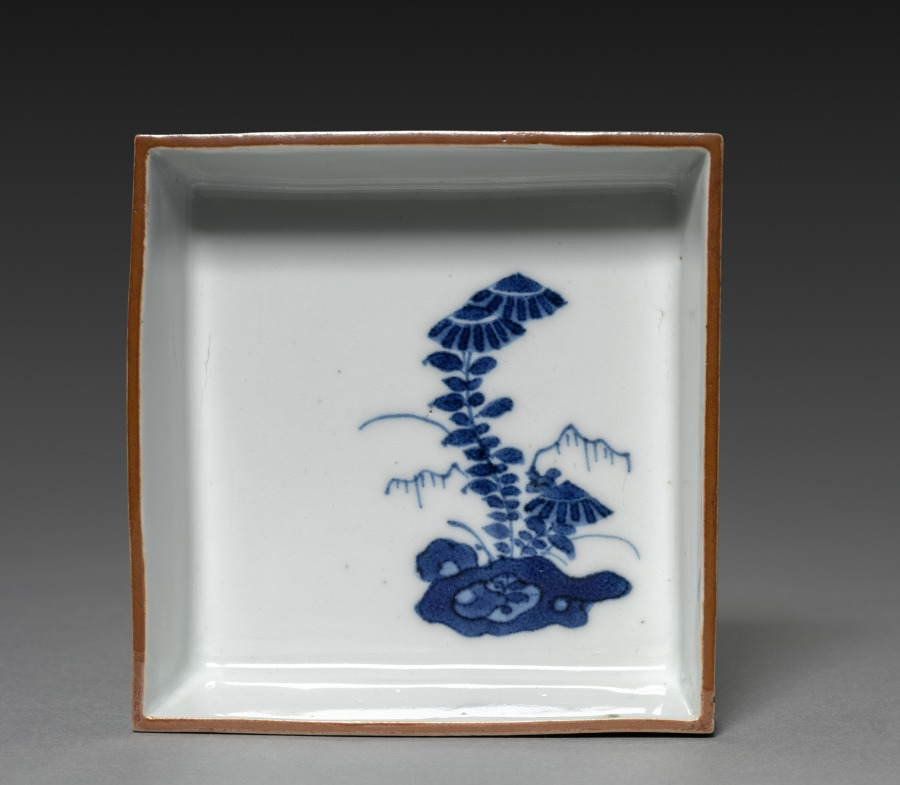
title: Side-Dish with Dandelion in Rocks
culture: Japan, Edo period (1615–1868)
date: 1700s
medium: One of a set of five dishes; porcelain with underglaze blue and overglaze iron oxide (Arita ware, Kutani style)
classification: Ceramic